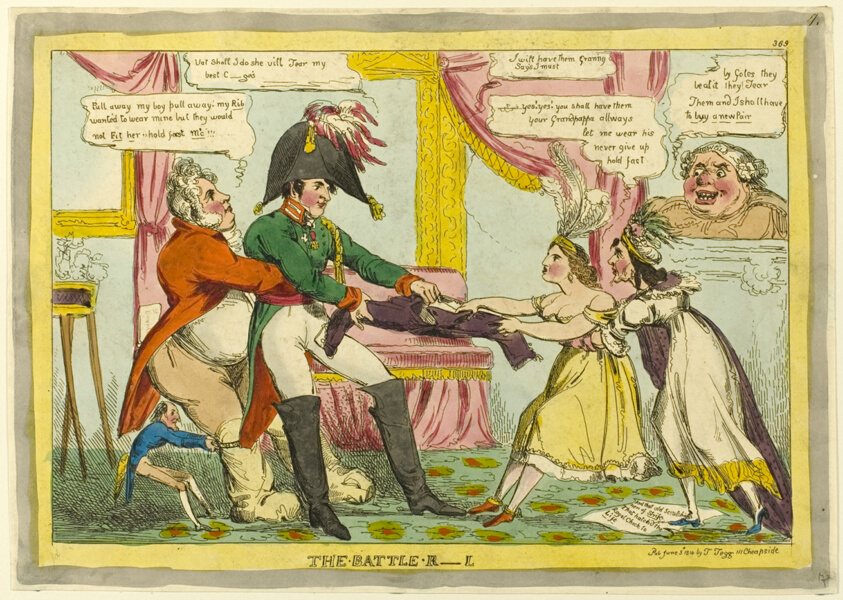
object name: Print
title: The Battle R—L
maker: Attributed to William Heath (English, 1794-1840); published by Thomas Tegg (English, 1776-1845)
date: published June 3, 1816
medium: Hand-colored etching on ivory wove paper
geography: England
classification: etching; print; prints and drawing